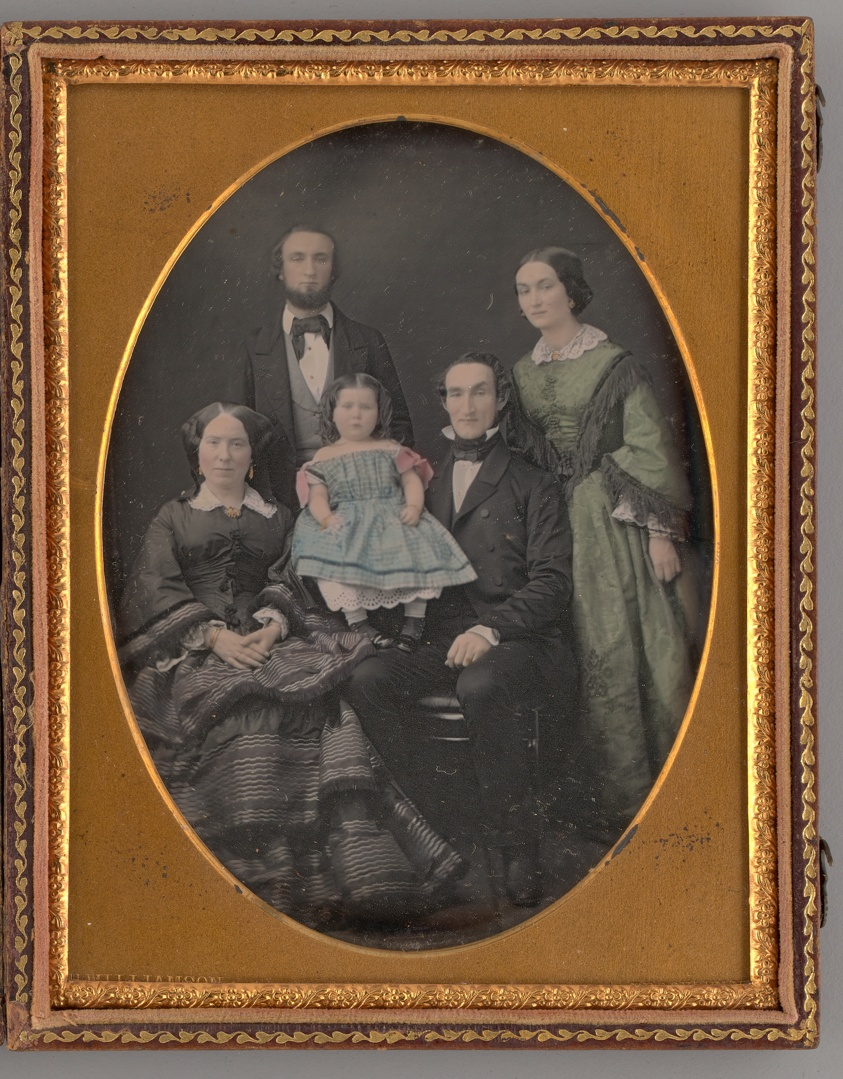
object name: Photograph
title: Untitled (Portrait of Two Women, Two Men, and One Girl)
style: 19th century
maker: Charles H. Williamson; American, 19th century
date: 1857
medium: Daguerreotype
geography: United States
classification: portrait; photograph; photographic process; photography; portrait; daguerreotype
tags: lundberg collection, portraits, families, family, people, portrait, portraits: child subject, portraits: female subject, portraits: male subject, portraits: multiple subjects